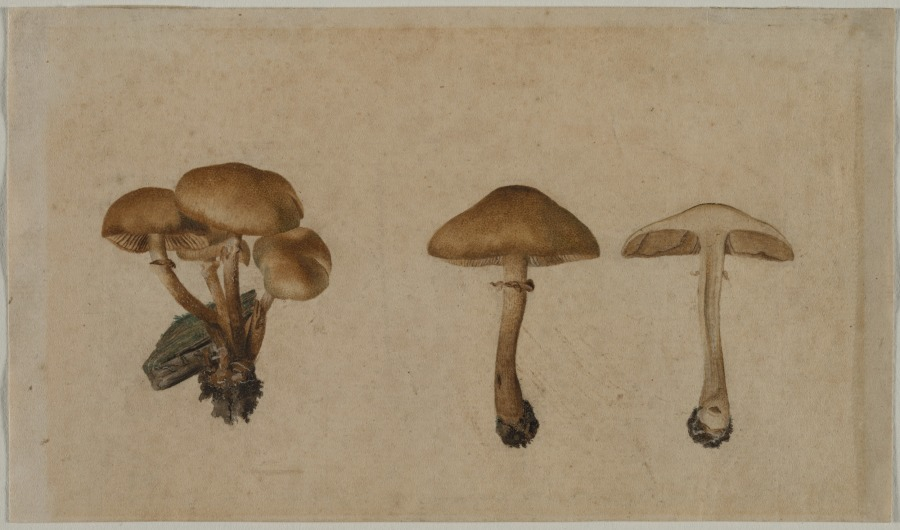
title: Mushrooms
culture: Germany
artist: Georg Wilhelm Baurenfeind (German, c. 1710–1763)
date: 1751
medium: brush and brown wash and gouache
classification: Drawing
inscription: VERSO, signed, across bottom, in brown ink: G.W. Baurenfeind ad vivum pinxit 14. Maij 1751 / [illegible] Zeichnüng [illegible]Unterschrift ; lower right, in graphite: [-Re-?]